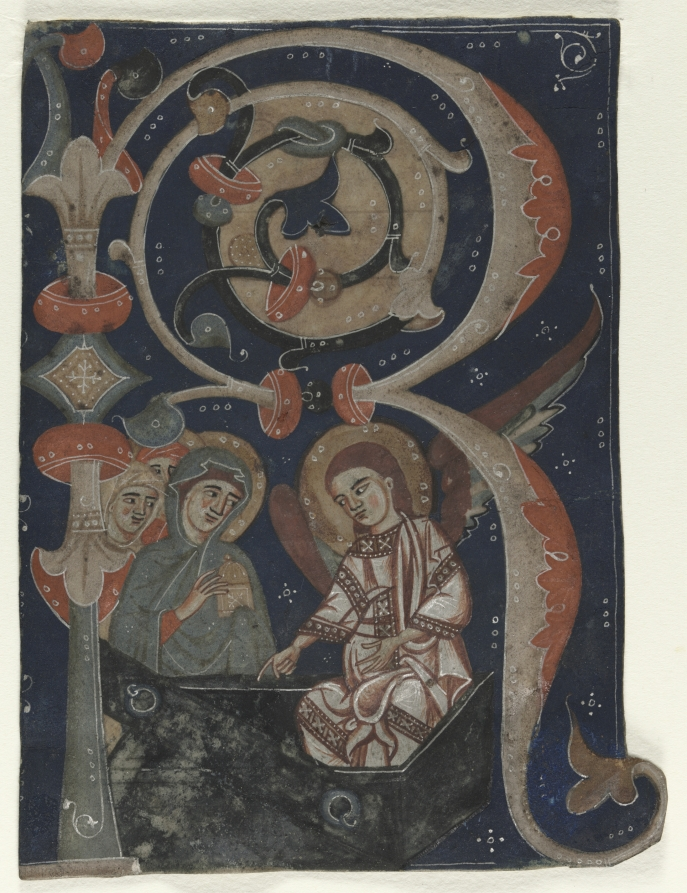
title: Historiated Initial (R) Excised from a Gradual: The Three Marys at the Tomb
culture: Italy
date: c. 1200–1230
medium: ink, tempera, and gold on parchment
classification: Manuscript